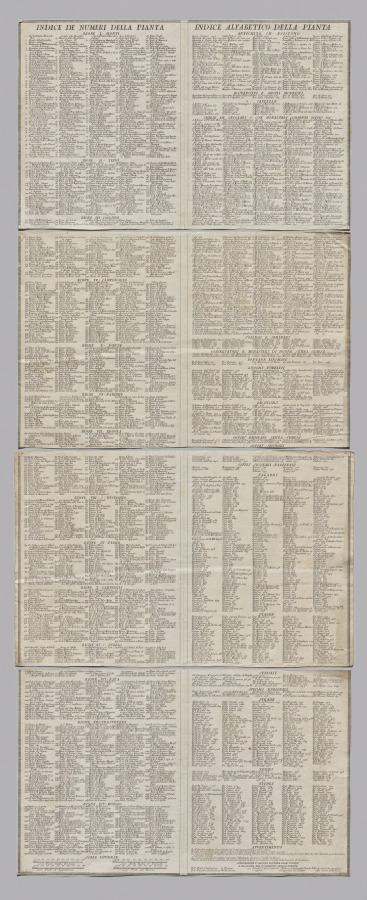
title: Nuova pianta di Roma data in luce da Giambattista Nolli l’anno MDCCXLVII, known as La Pianta Grande di Roma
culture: Italy, 18th century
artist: Giovanni Battista Nolli (Italian, 1701–1756)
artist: Carlo Nolli (Italian, 1690–1790)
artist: Rocco Pozzi (Italian, 1701–1774)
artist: Pietro Campana de Soriano (Italian, 1725–c. 1779)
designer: Stefano Pozzi (Italian, 1699–1768)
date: 1748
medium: 12 sheets with 4 index sheets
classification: Print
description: The monumental Pianta Grande di Roma, or Large Plan of Rome, which measures about 5 x 7 feet when its twelve plates are assembled, is a landmark in both cartography and printmaking. The map is considered the first scientific rendering of Rome, establishing new standards of accuracy and thoroughness when it was published in 1748. Devised by the Lombard architect and surveyor Giovanni Battista Nolli (Italian, 1701-56), the creation of the map required over ten years of surveying the city carried out by Nolli and a team of assistants with the help of new measuring devices. In Nolli’s “ichnographic” (also called “ground”) plan, architectural features and the urban infrastructure are reduced to a single horizontal slice, a minutely detailed footprint that conveys dimensions, proportions, and orientations to scale with the utmost clarity.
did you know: To make this map, Pope Clement XII granted the mapmaker permission to measure courtyards and other interior, inaccessible spaces in monastic communities, even those in nuns’ convents, which was controversial at the time.